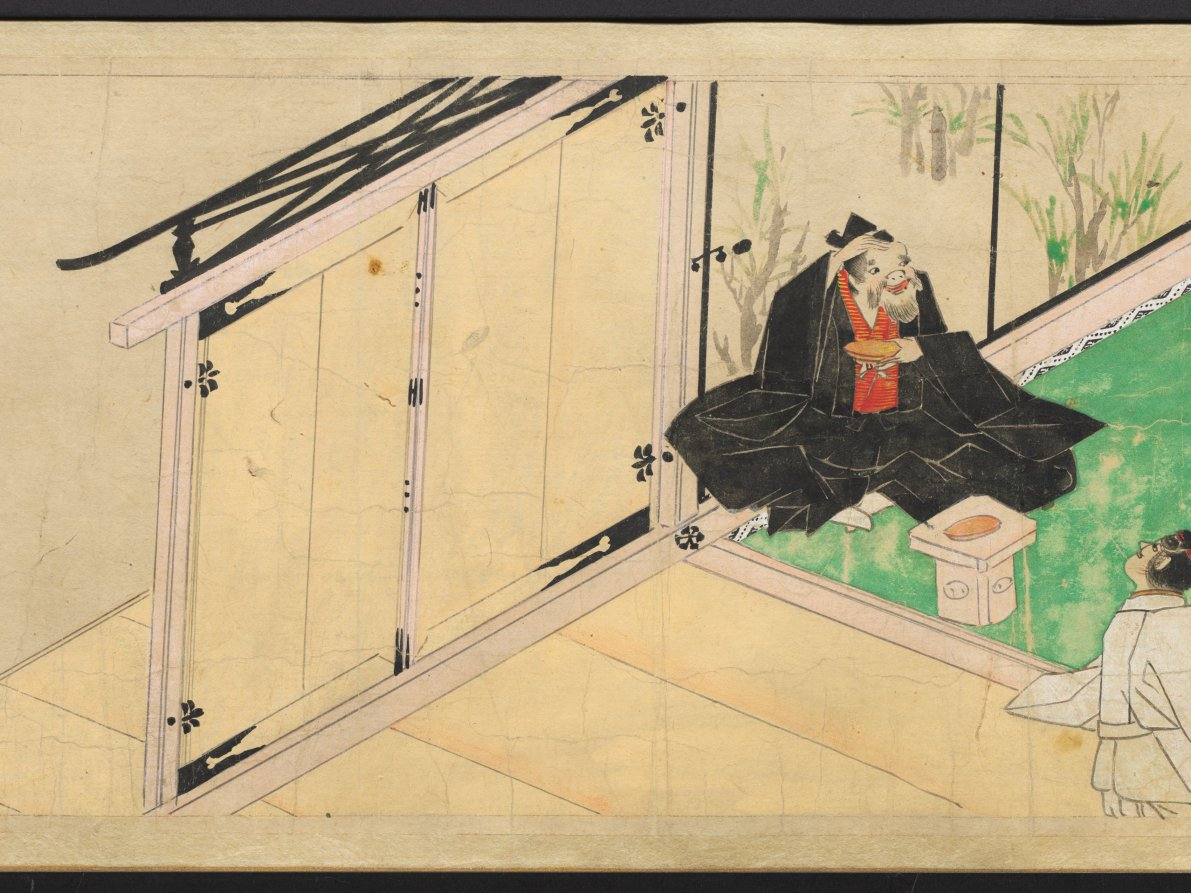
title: The Saltmaker's Story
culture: Japan, Edo period (1615–1868)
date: early 1600s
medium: One of a pair of handscrolls; ink, color, and gold on paper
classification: Painting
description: Once read and copied by girls at New Year’s celebrations and included in dowries, The Saltmaker’s Story is a rags-to-riches tale in which daughters are gifts from the gods. Despite his simple outlook, the main character progresses from humble roots as an associate at Kashima Shrine to the elite status of grandfather of the emperor through the intervention of the Kashima deity. The Saltmaker’s Story is traditionally presented in a set of three scrolls, but the text of this set has been removed by a previous owner, who remounted the illustrations as a pair. The paintings of this one take us from right to left through the second half of the tale.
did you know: This handscroll originally had texts before its paintings, but the texts were removed.